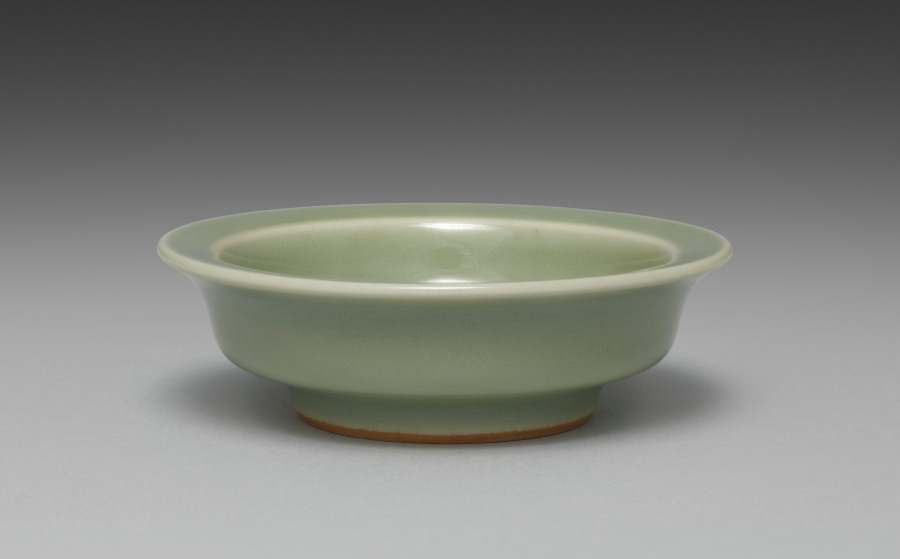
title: Saucer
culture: Japan, Meiji period (1868–1912)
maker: Seifū Yohei III (Japanese, 1851–1914)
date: 1893–1914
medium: One from a set of ten dishes; porcelain with green glaze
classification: Ceramic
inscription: 清風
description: Yohei III’s main output for his sophisticated clientele was in the form of tea sets and dining sets. He created a range of dishes in green glazes. He often produced in pairs, sets of five, or sets of ten. For this set of ten small dishes in a simple, round form that emphasizes the glaze above all, the box lid designates the piece as seiji, or green-glazed porcelain, using a general term for the extensive palette of green glazes often called celadon in English. The box lid further identifies the dishes themselves as tōchō, literally “bean-sized saucers,” a size that makes them suitable for dipping sauces.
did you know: The ten dishes in this set are stored in stacks of five in a two-compartment box.